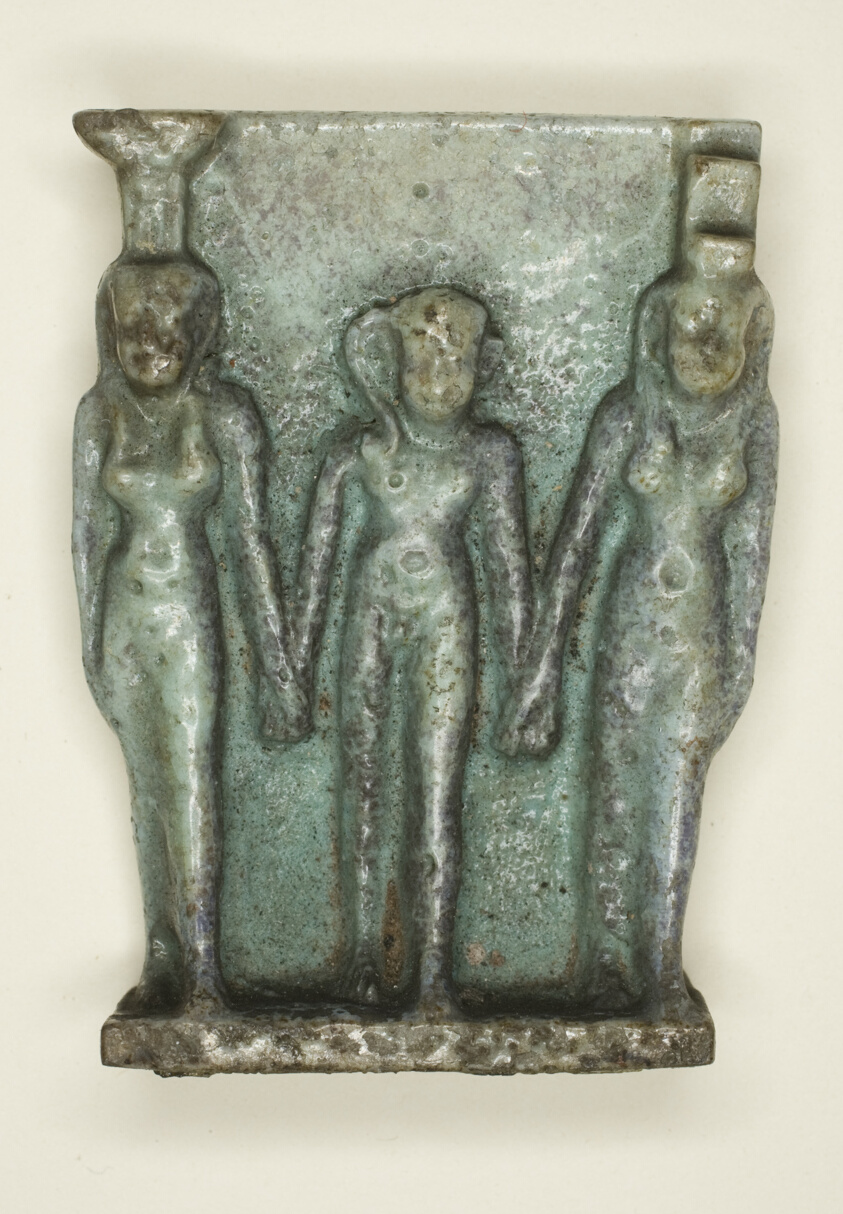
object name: Costume and Accessories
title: Amulet of the Osirian Triad (Nephthys, Horus, and Isis)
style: late period (egyptian), twenty-sixth dynasty, saite period, egyptian, ancient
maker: Egyptian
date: Late Period, Dynasty 26 (664-525 BCE)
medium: Faience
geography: Egypt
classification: amulet; jewelry; mummy goods; ancient art; costume; faïence (composite material)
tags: goddesses, gods (deities), children